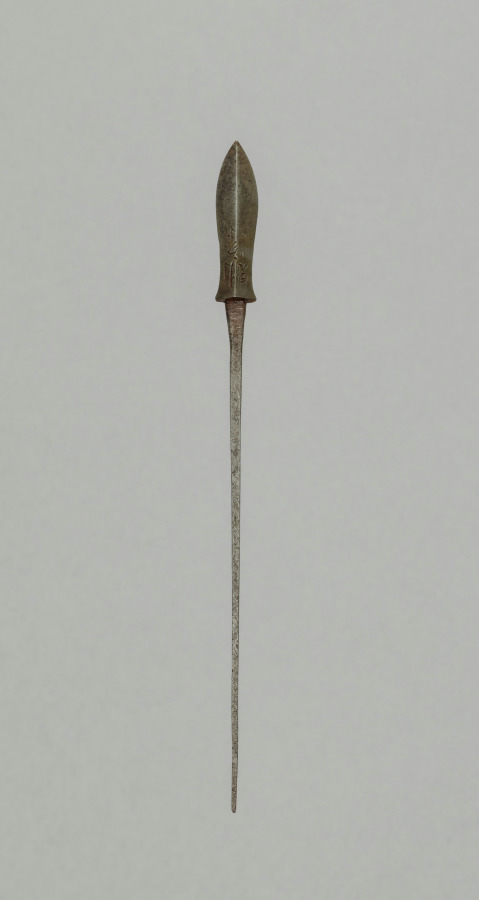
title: Arrow Point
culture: Japan, Edo period (1615–1868)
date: 1700s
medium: steel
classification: Arms and Armor